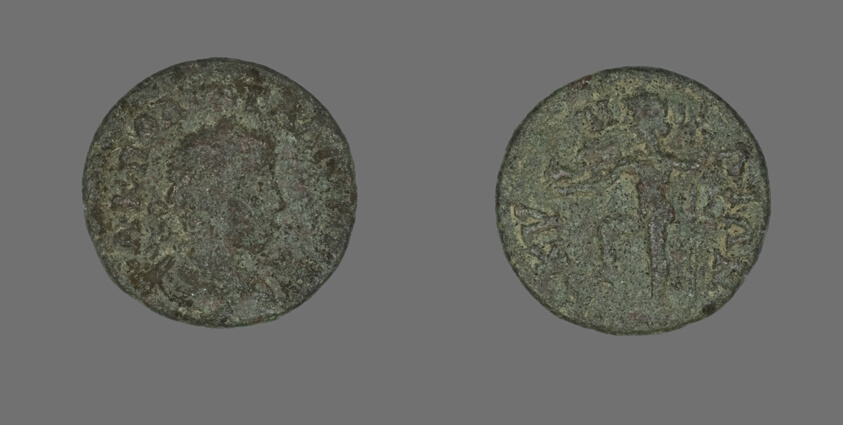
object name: Coin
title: Coin Portraying the Emperor Gallienus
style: roman (ancient, style or period), ancient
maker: Roman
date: 253-268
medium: Bronze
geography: Roman Empire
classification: coin; ancient art